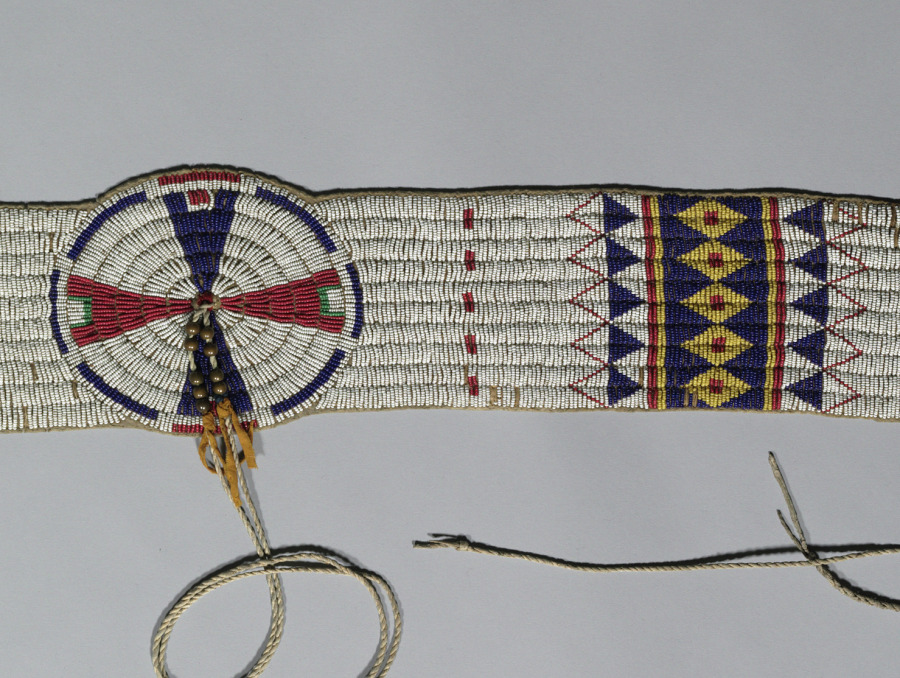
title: Blanket Strip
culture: Native North America, Plains, Tsitsistas (Cheyenne)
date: c. 1900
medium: Native-tanned hide, glass beads, yellow trade cloth, brass beads, sinew thread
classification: Leather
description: The animal-hide robes basic to Plains attire were often ornamented with quilled or beaded strips, which also were stitched to the blankets that replaced robes. This beaded example carries the cross-in-a-circle motif that symbolizes the world, the four directions, and the sacred center, concepts central to Plains worldviews. In the 1932 words of Black Elk, the Oglala Lakota (Sioux) holy man, “[T]he power of the world always works in circles. . . . The flowering tree was at the center of the hoop, and the circle of the four quarters nourished it. . . . Everything the power of the world does is done in a circle.”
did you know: This beaded strip was stitched to a hide or a blanket.